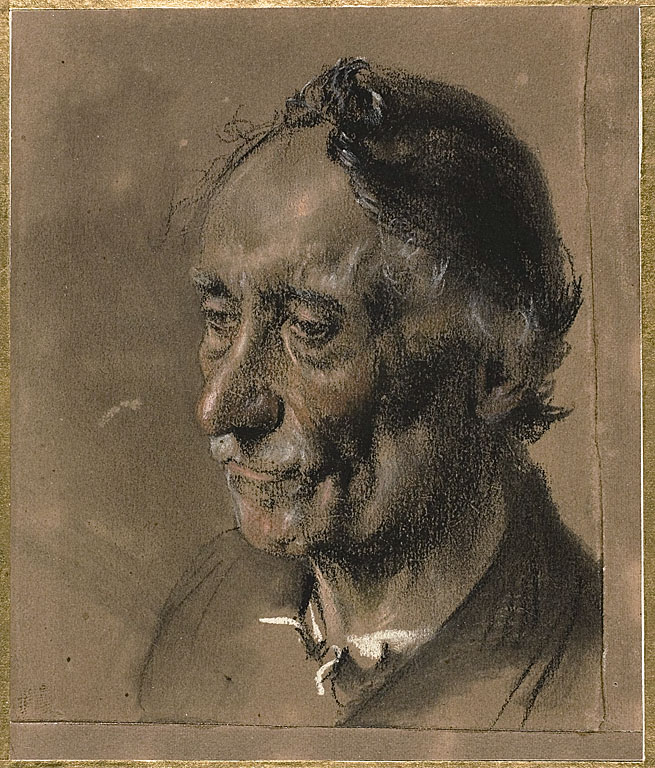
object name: Drawing and Watercolor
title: Head of an Old Man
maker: Adolph Menzel; German, 1815–1905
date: c. 1850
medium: Charcoal and pastel on paper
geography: Germany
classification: chalk; drawings (visual works); prints and drawing